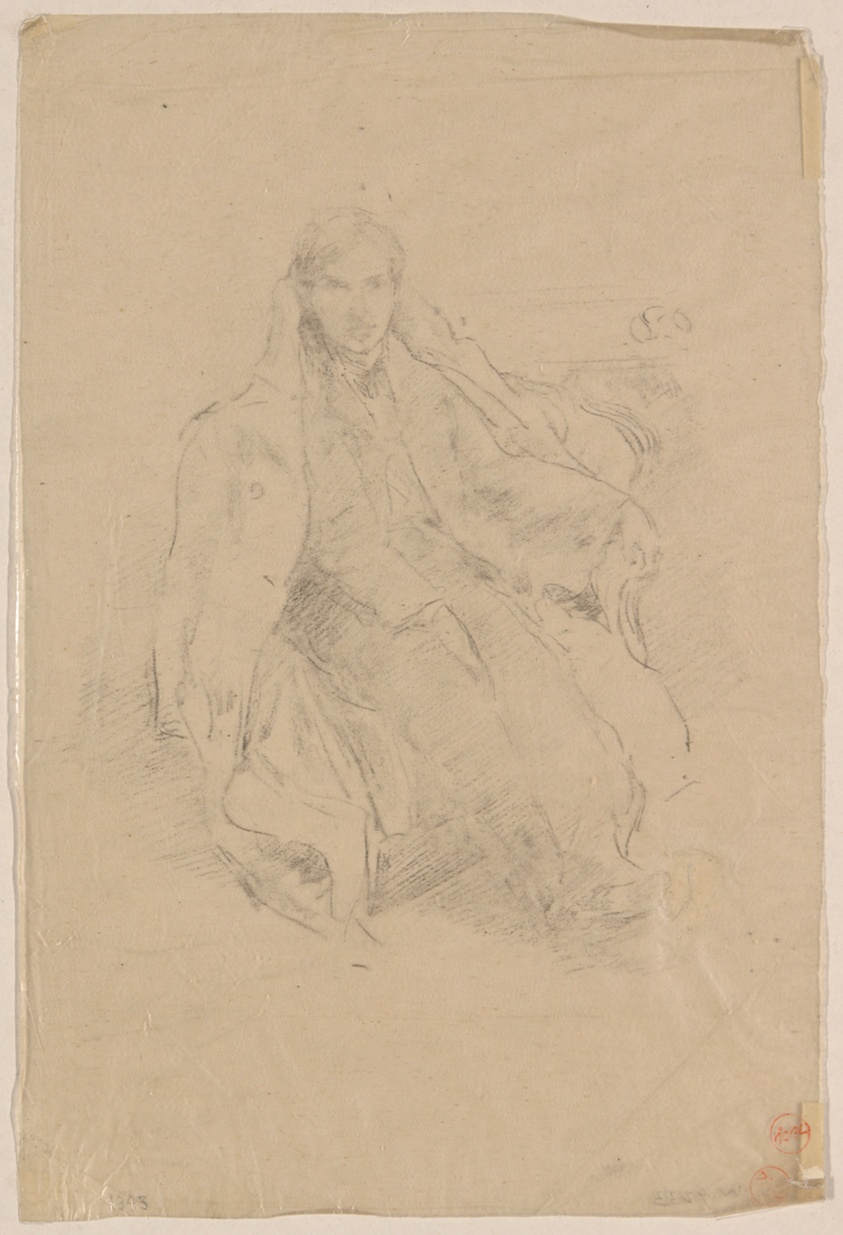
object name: Drawing and Watercolor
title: H.C. Pollitt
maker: James McNeill Whistler (American, 1834-1903)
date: 1896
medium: Lithographic crayon on thin, transparent transfer paper, tipped onto card (modern mount)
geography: United States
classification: lithographic crayon; drawings (visual works); prints and drawing; paper